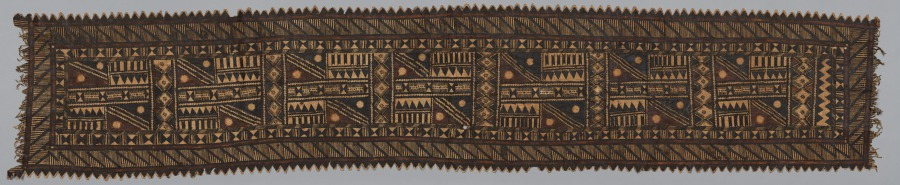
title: Tapa Cloth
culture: Oceania, Melanesia, Fiji Islands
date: Before 1971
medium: mulberry bark (Broussonetia papyrifera)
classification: Textile